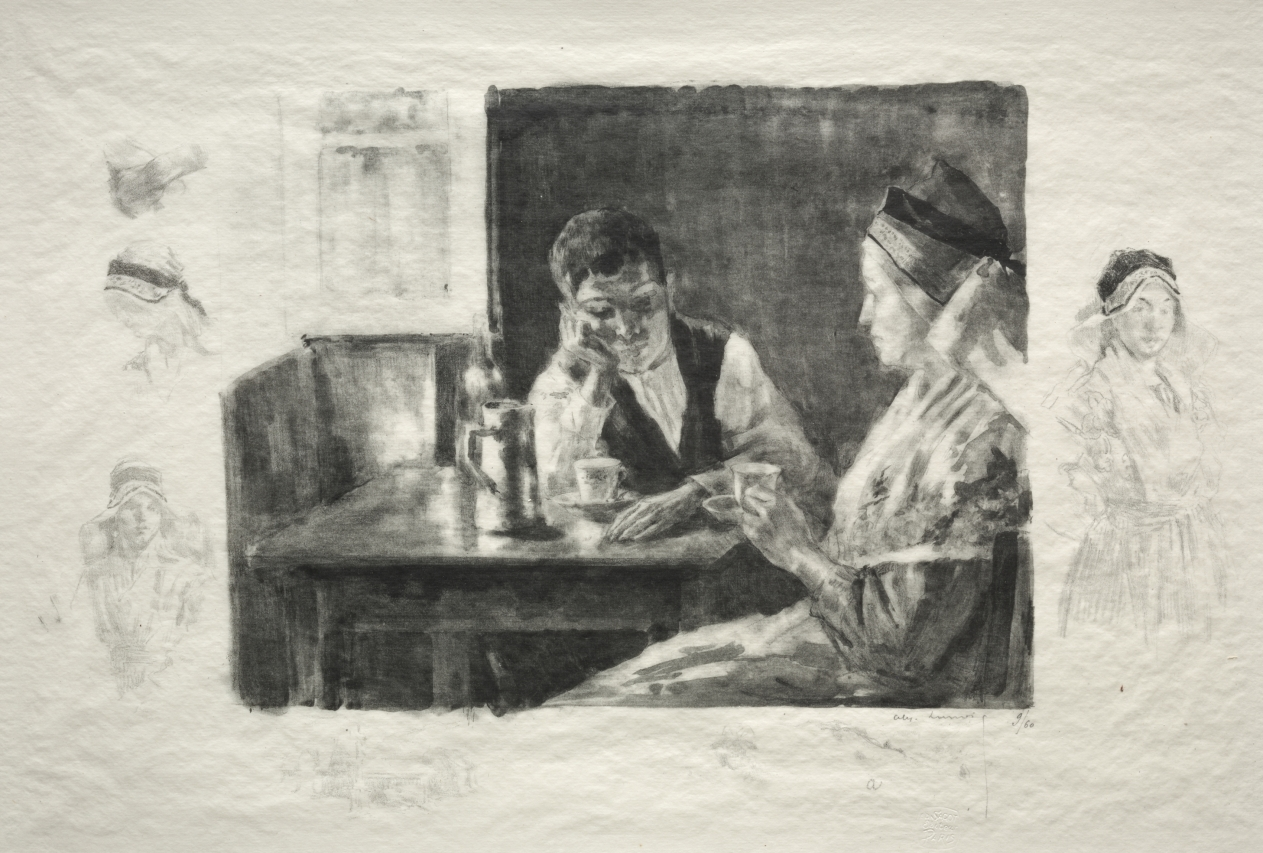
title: Interior of a Peasant's House, Valley of Bethmale, France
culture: France, 19th century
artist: Alexandre Lunois (French, 1863–1916)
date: c. 1888–1914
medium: lithograph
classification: Print